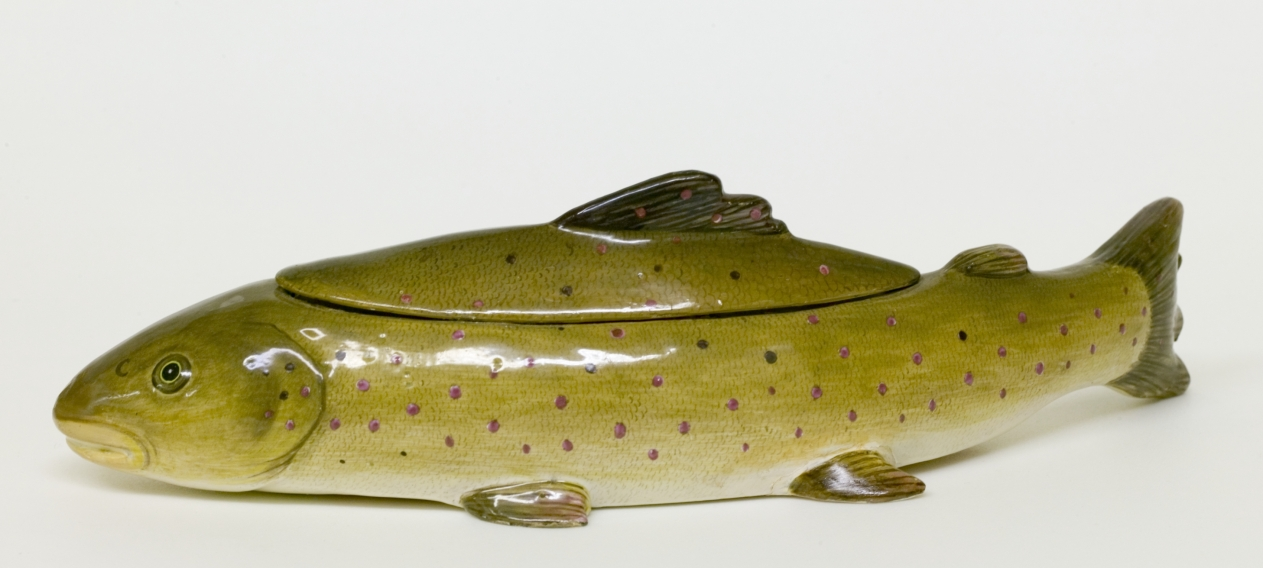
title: Box in the Form of a Fish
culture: France, Niderviller, 18th century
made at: Niderviller Factory (French)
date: 1767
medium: ceramic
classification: Ceramic